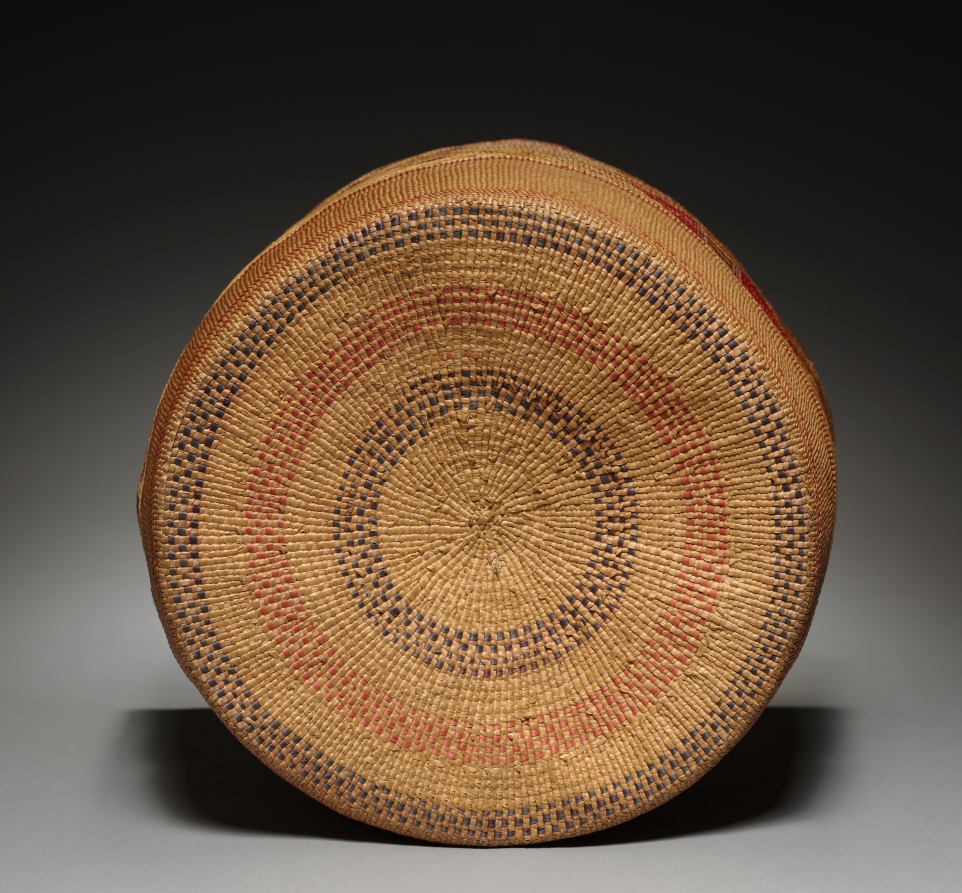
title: Cooking Basket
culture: Northwest Coast, Tlingit, late 19th Century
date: late 1800s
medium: Spruce root; twined, false embroidery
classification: Basketry